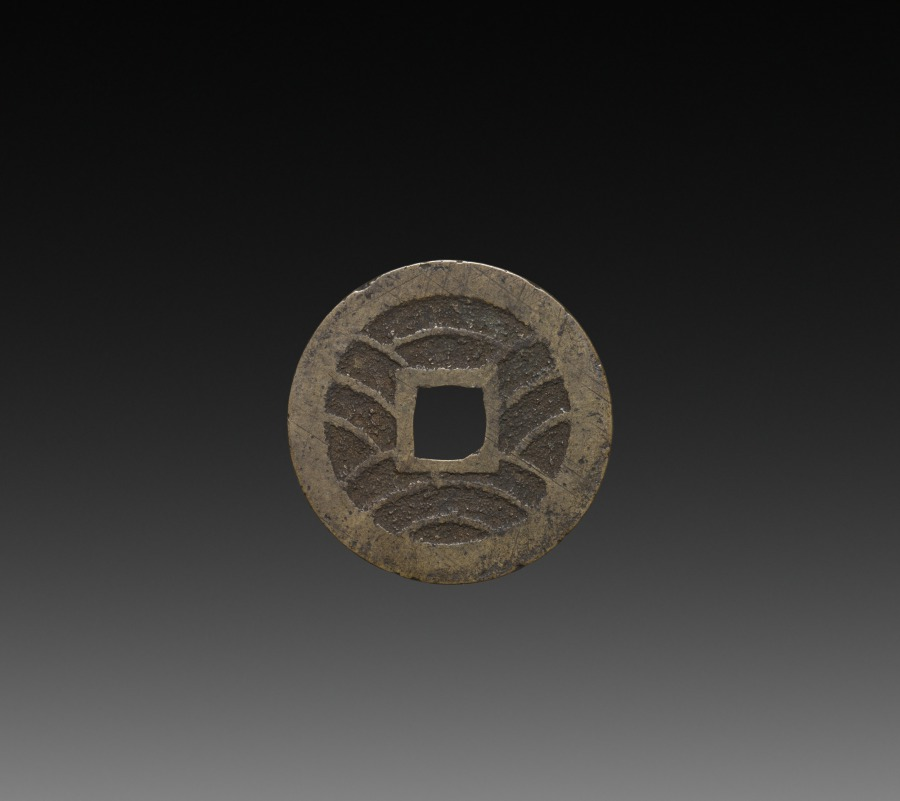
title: Four Mon Kan'ei Tsūhō Coin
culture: Japan, Edo period (1615–1868)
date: 1768–1868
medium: copper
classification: Coins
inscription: 寛永通寳